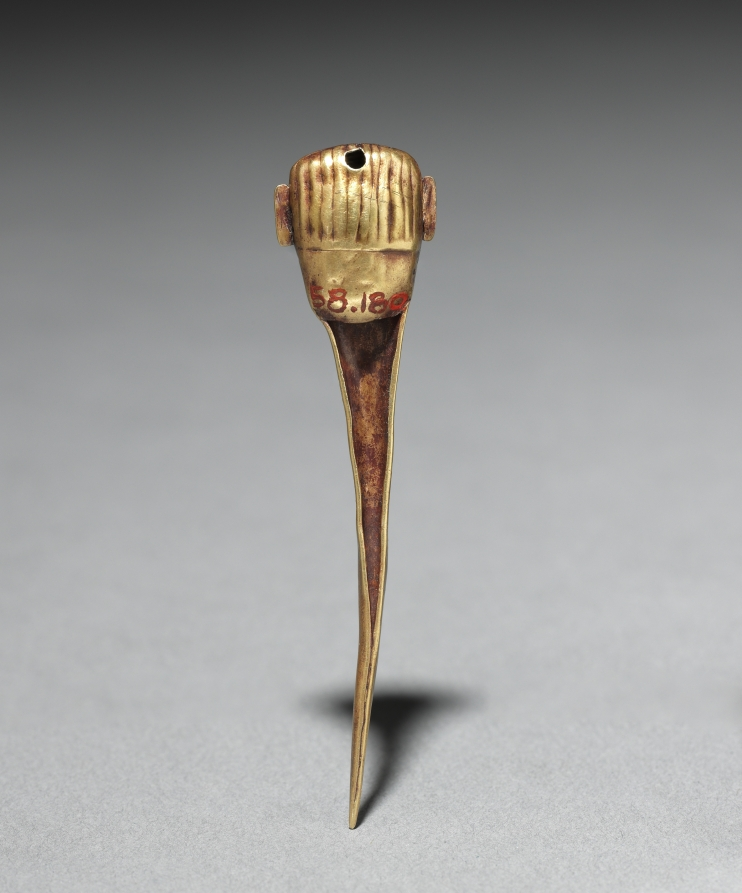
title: Pin Ornament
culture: Peru, North Highlands, Chavín de Huantar(?), Chavín style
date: c. 500–200 BCE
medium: hammered and cut gold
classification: Metalwork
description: There seems to be a link between Chavín religion and appearance of the Andes’ first large precious-metal objects, made using revolutionary new metallurgical processes. Chavín may have developed these technical innovations to express the inexpressible, the "wholly other" nature of its religion. In many areas, elite men and women wore the ornaments as emblems of their ties to this religion, and eventually were buried with them. These 16 objects, along with three others not in the museum’s collection, are said to have come as a group from Chavín itself.